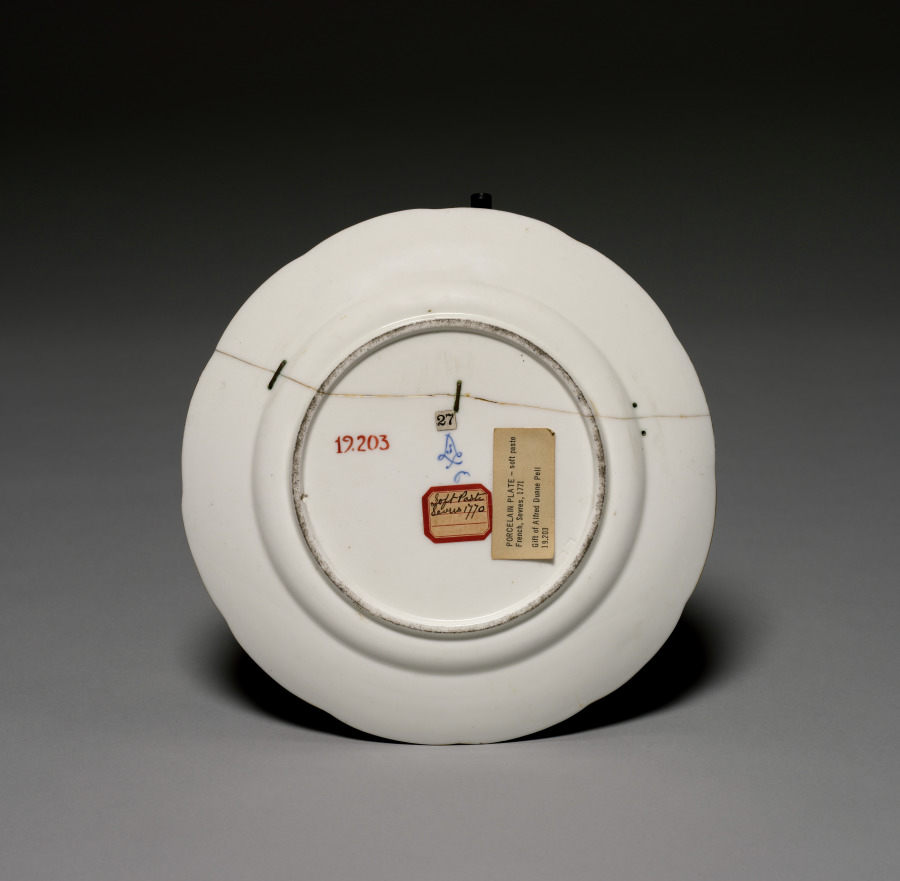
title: Plate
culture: France, Sèvres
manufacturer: Sèvres Porcelain Factory (French, est. 1756)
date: 1771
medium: soft-paste porcelain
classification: Ceramic